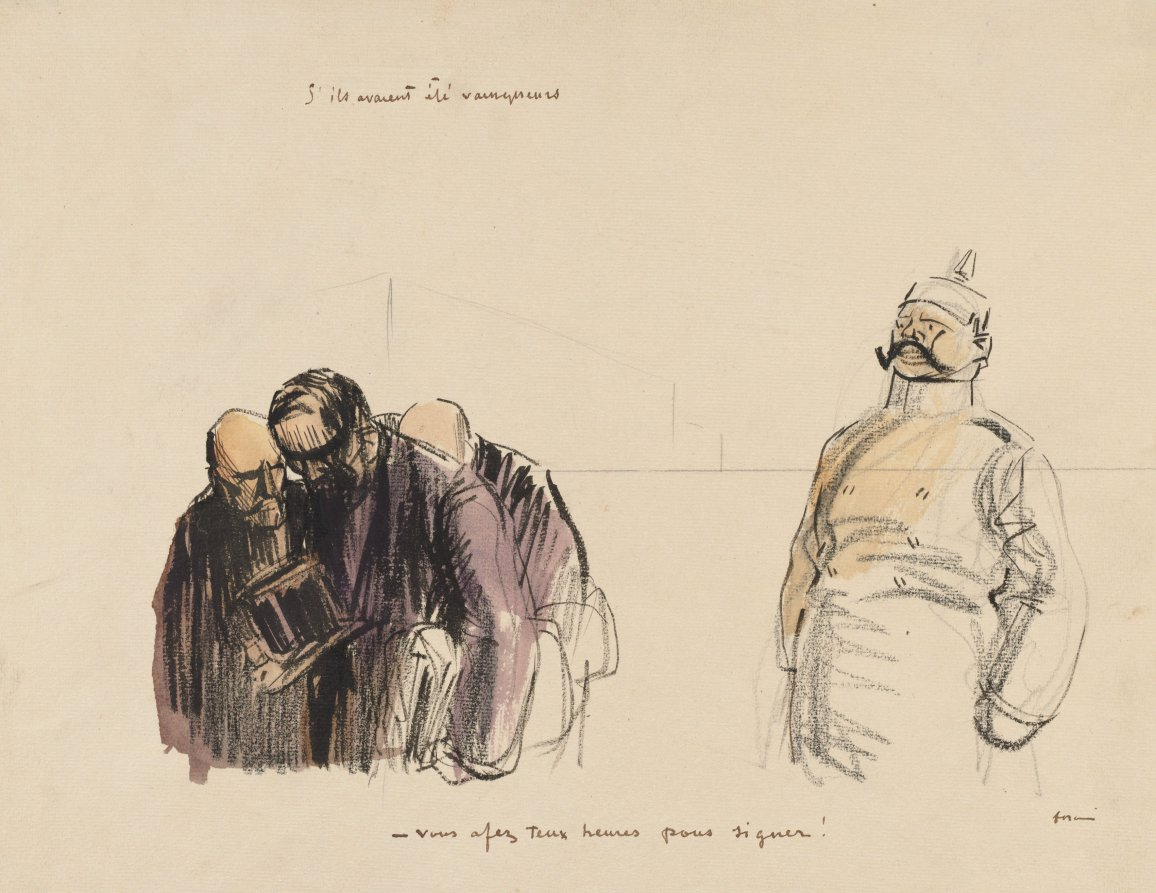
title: If they had been victorious - "You Have Two Hours in which to Sign"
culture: France, 20th century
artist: Jean Louis Forain (French, 1852–1931)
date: c. 1919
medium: black crayon and watercolor, over graphite and brown ink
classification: Drawing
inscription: signed, lower right, in brown ink: forain ; by artist, upper left, in brown ink: S'ils avaient été vainqueurs ; by artist, lower center, in brown ink: - vous avez deux heures pour signer! ; lower right, in graphite: A2186~